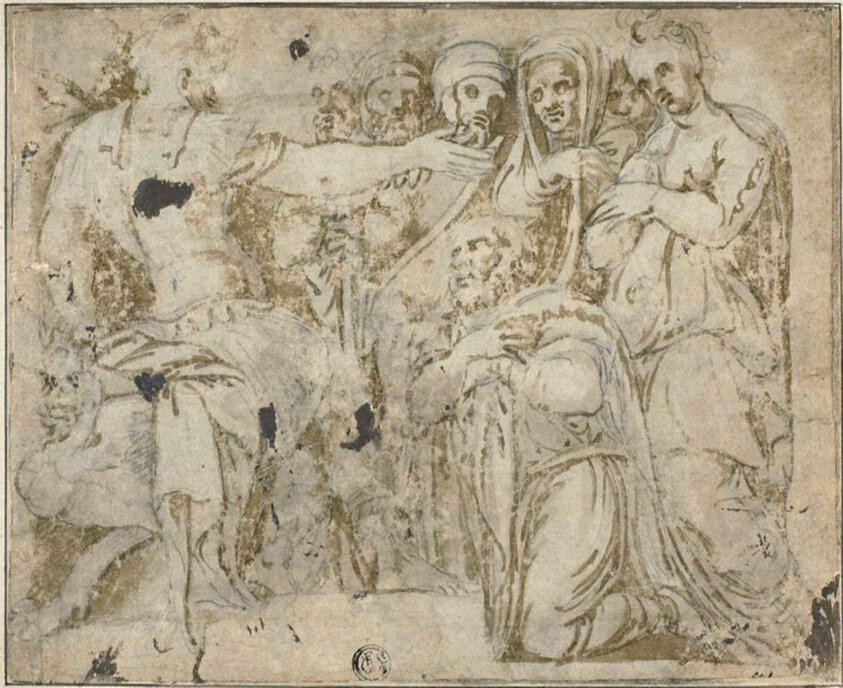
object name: Drawing and Watercolor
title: Family of Darius before Alexander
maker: After Polidoro Caldara, called Polidoro da Caravaggio; Italian, c. 1499-c. 1543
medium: Pen and brown ink, with brush and brown wash, over black chalk, on tan laid paper, laid down on ivory laid paper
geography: Italy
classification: ink with wash; drawings (visual works); prints and drawing